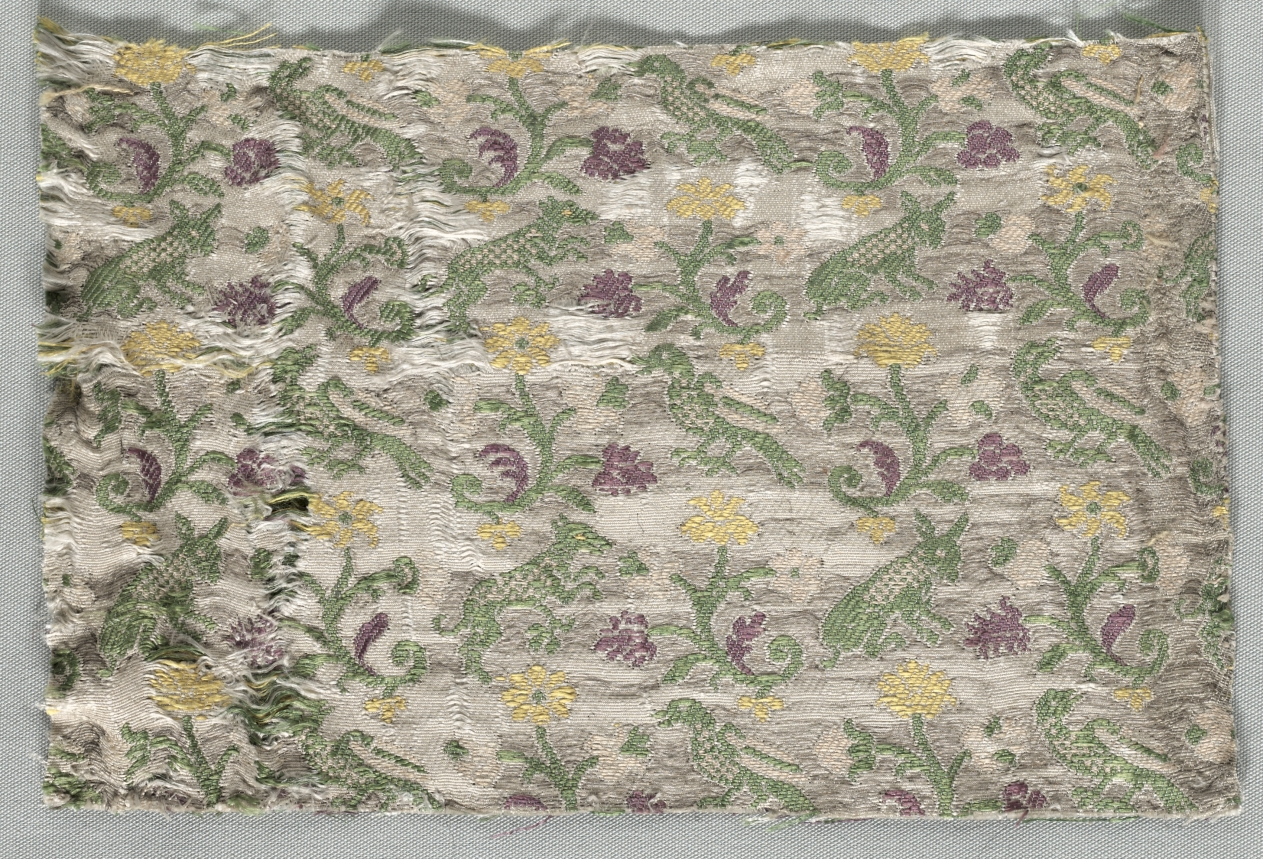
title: Textile Fragment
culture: Italy, 17th century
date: 1600s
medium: silk lampas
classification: Textile